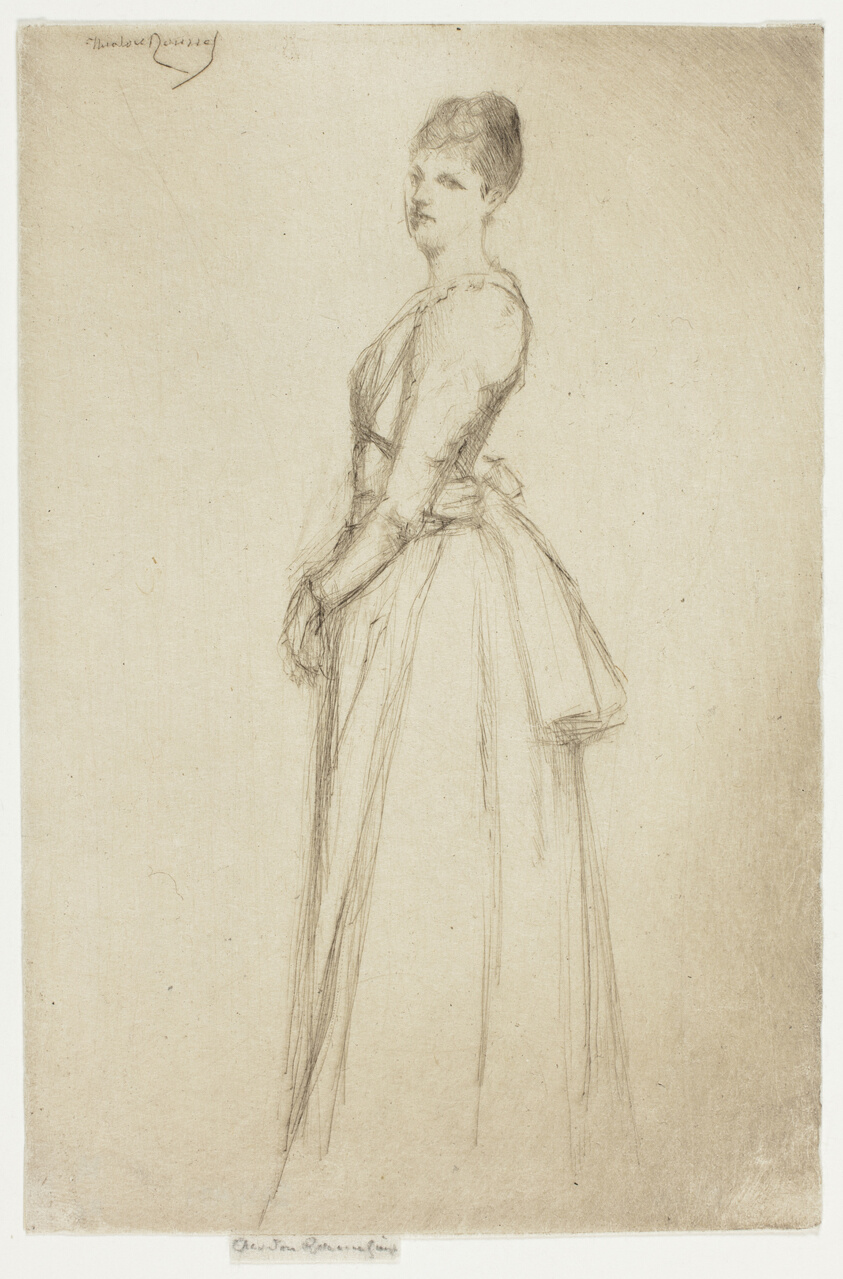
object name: Print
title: Portrait of Mrs. C. W.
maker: Theodore Roussel (French, worked in England, 1847-1926)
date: 1890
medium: Drypoint in light black on ivory Japanese paper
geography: England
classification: drypoint; print; prints and drawing